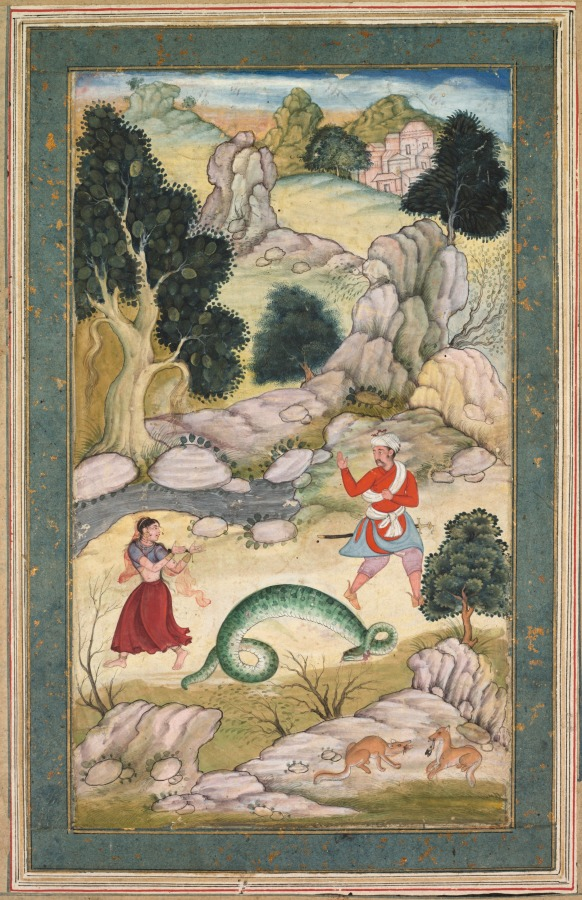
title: Lovers parting, page from a book of fables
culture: Northern India, Mughal court, 16th century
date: c. 1590–95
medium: Gum tempera, ink, and gold on paper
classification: Painting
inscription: Banyavati inscription in Devenagari script in left margin describing the subject of the miniature: 'We failed to understand each other when we were together, the understanding in that respect may come to us on being separated".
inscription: Verso: From an album preface Persian text in nasta‘liq script: . . . and he also added illustrations and decorations and in truth an album was arranged that ever since the visage of rosy-cheeked beauties has been bedecked by their black sweet-smelling tresses, the like of the calligraphic lines that are written upon it have never been set upon any paper by a pen, and ever since the album of the sky has been illuminated by the luminosity of the moon and the sun, the light of the understanding . . .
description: The lovers have met in a remote wilderness location, away from the city shown in the distance. However, their affair has run its course, and they decide to part ways, each walking in opposite directions through an ominous landscape, where strange rock formations and an oversized serpent-slain by foxes gnawing on its innards-lend a sense of foreboding. As Mughal court painting developed into the last decades of the 16th century, artists began using increasingly muted colors and gentler shading techniques than they did in the more robust Adventures of Hamza at the left. The omission of a light source and shadows adds to a timeless, otherworldly impression to the landscape.